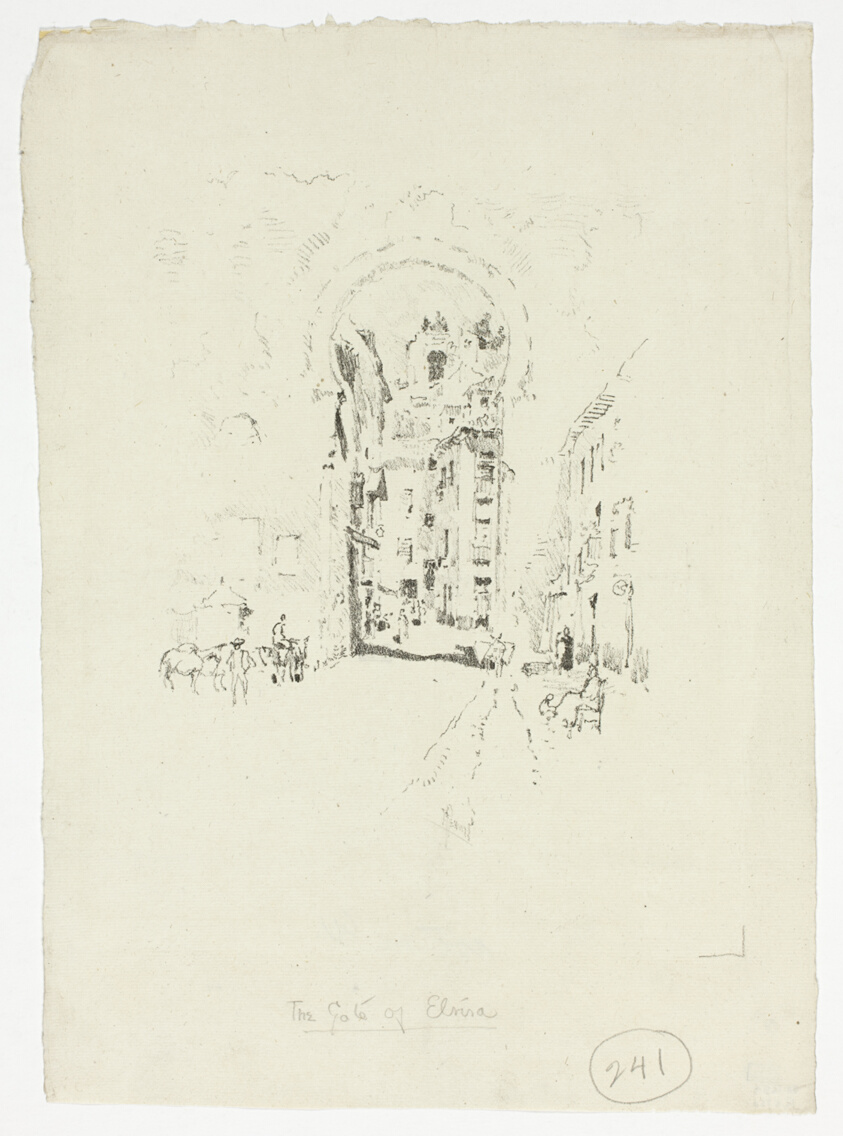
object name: Print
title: Gate of Elvira, Granada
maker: Joseph Pennell (American, 1857-1926)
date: c. 1895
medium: Lithograph on off-white laid paper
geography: United States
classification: lithograph; print; prints and drawing